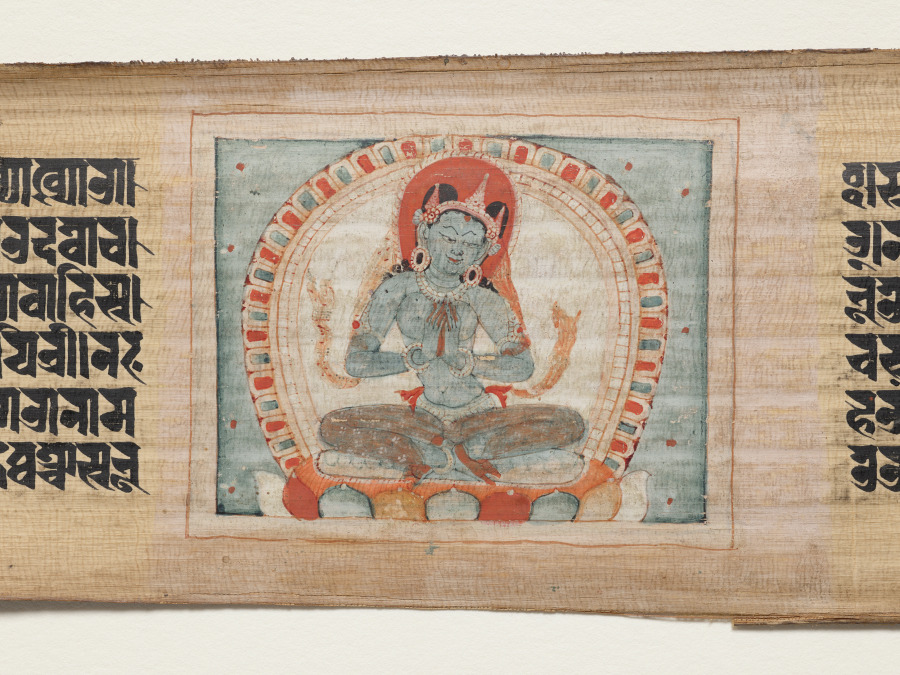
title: Three female figures, folio 89 (verso), from a Manuscript of the Perfection of Wisdom in Eight Thousand Lines (Ashtasahasrika Prajnaparamita-sutra)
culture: Eastern India, Bihar, Vikramashila Monastery. Painting: Nepal, Kathmandu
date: Sunday, September 14, 1119 (year 239 of the Newar Samvat in the month of Ashvina)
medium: gum tempera and ink on palm leaf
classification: Painting